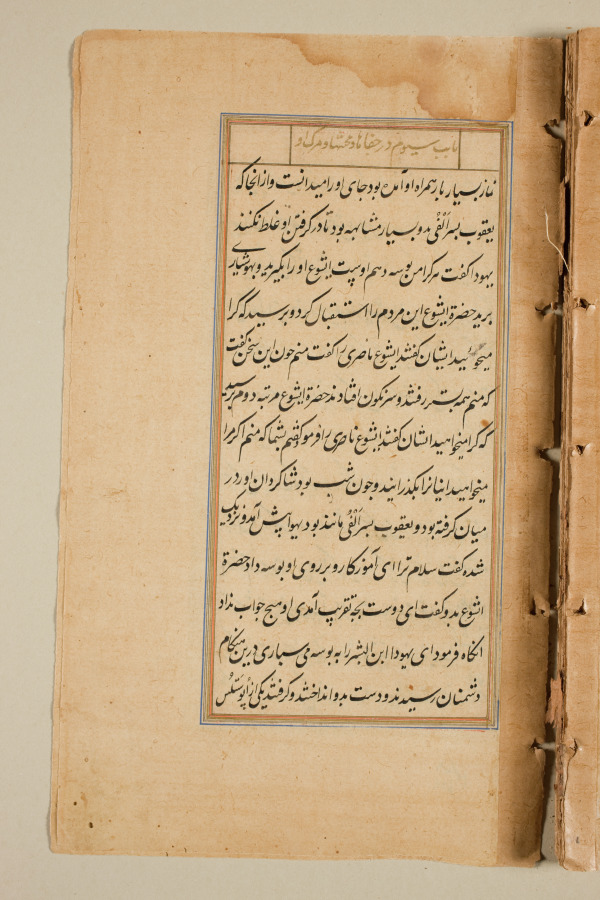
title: Text page from a Mirror of Holiness (Mir’at al-quds) of Father Jerome Xavier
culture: Mughal India, Allahabad, made for Prince Salim (1569–1627)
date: 1602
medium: Ink and gold on paper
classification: Manuscript